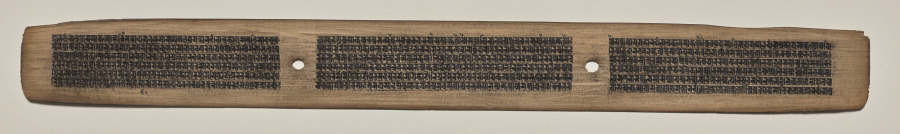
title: Text, Folio 60 (recto), from a Manuscript of the Perfection of Wisdom in Eight Thousand Lines (Ashtasahasrika Prajnaparamita-sutra)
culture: Eastern India, Bihar, Vikramashila Monastery. Painting: Nepal, Kathmandu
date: Sunday, September 14, 1119 (year 239 of the Newar Samvat in the month of Ashvina)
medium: gum tempera and ink on palm leaves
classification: Painting